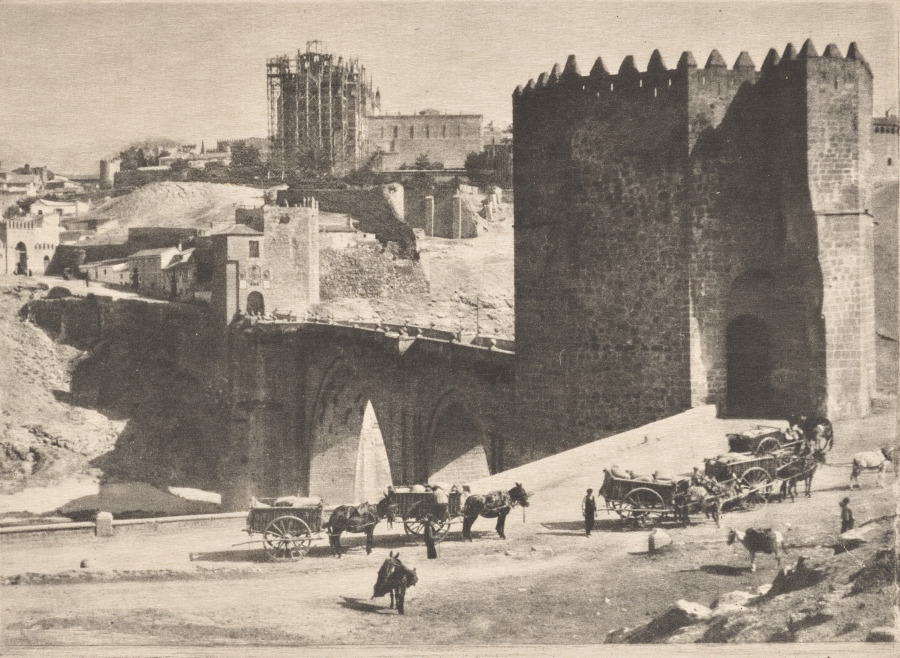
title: Bridge of St. Martin, Toledo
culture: Scotland, 20th century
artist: J. Craig Annan (British, 1864–1946)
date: 1914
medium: Rotogravure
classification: Photograph